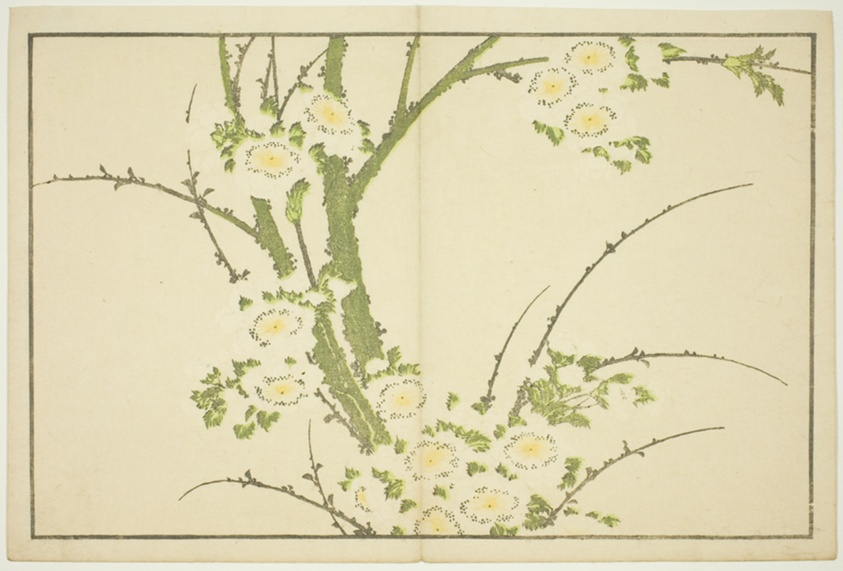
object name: Print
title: Flowers, from The Picture Book of Realistic Paintings of Hokusai (Hokusai shashin gafu)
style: Japanese (culture or style)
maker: Katsushika Hokusai 葛飾 北斎; Japanese, 1760-1849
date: c. 1814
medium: Color woodblock print (album sheet)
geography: Japan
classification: woodblock print; print; asian art